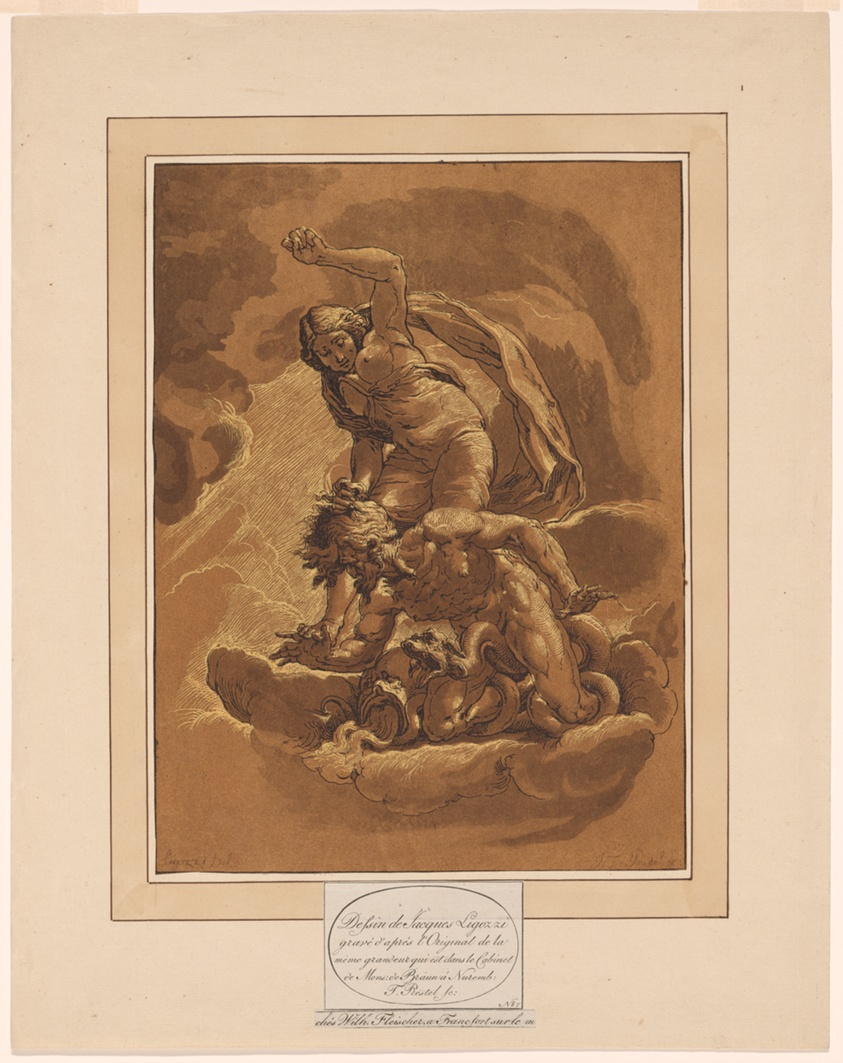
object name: Print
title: The Triumph of Truth over Envy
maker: Maria Katharina Prestel (German, 1747–1794); after Jacopo Ligozzi (Italian, 1547–1627)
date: 1781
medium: Etching and aquatint, from three plates, in brown and black, with metallic gold, on ivory laid paper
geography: Germany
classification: prints and drawing; paper; aquatint; etching; print